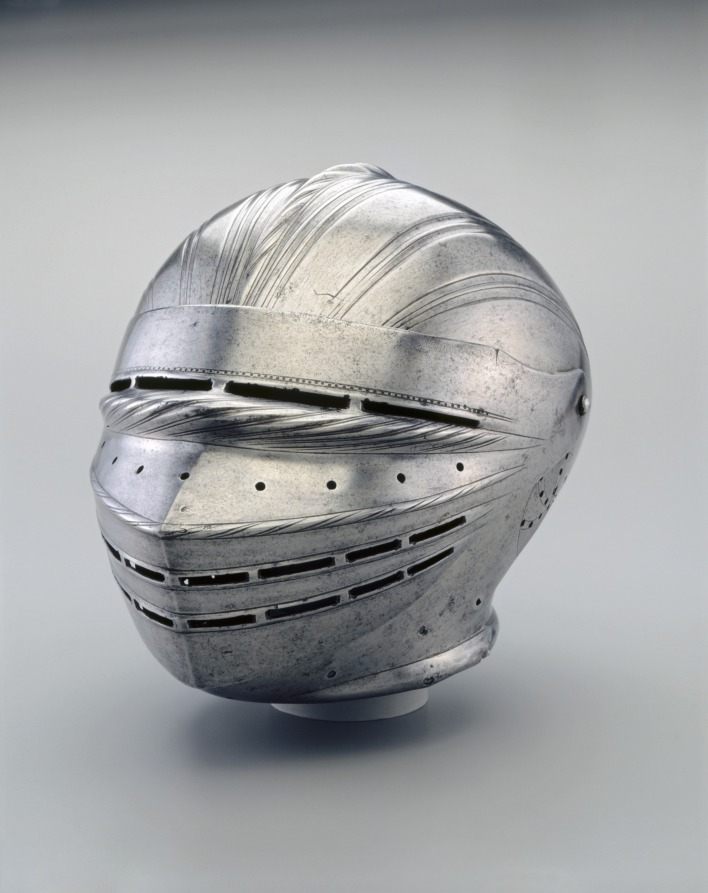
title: Field Armor in Maximilian Style: Helmet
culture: Germany, Augsburg(?), early 16th century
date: c. 1510–15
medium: fluted steel with leather straps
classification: Arms and Armor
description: Most of the elements of this armor were made together, forming a single suit. The lower legs contain some modern restorations. The helmet is believed to be the work of the esteemed Augsburg armorer, Lorenz Helmschmied, who was active at the Hapsburg, Mantua, and Urbino courts between 1467 and his death in 1515.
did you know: This armor was made to mimic the trend of pleated clothing that was popular at the time.